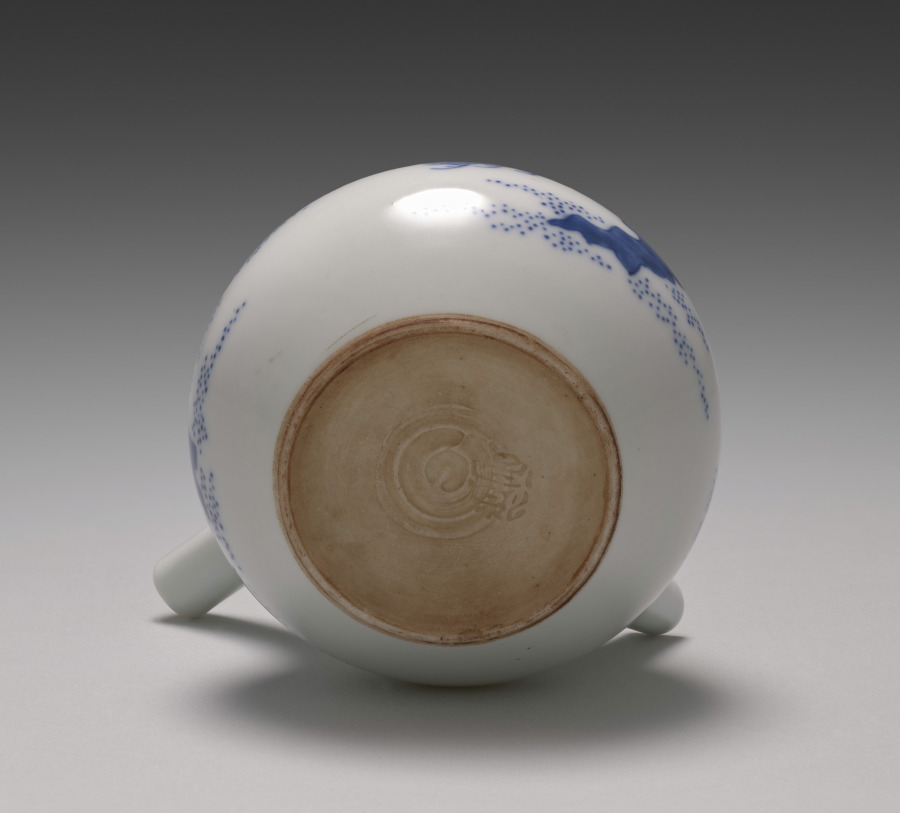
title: Teapot with Pines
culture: Japan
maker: Seifū Yohei III (Japanese, 1851–1914)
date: 1893–1914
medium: Porcelain with underglaze blue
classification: Ceramic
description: Side-handled teapots known as kyūsu and hot water coolers, or yuzamashi, are essential components of sencha tea sets. The teapot is, of course, meant for steeping and serving the tea. Yuzamashi are used to cool boiled water to the ideal temperature for the type of tea to be brewed. This teapot has a pine in underglaze blue on each side. The tip of one of these pines reaches onto the tiny lid, and as with the trees on the Water Cooler with Pines, CMA 2022.163, the trunks are curvy ribbons with little definition. Considering the execution of their designs, one might imagine the pot and cooler to have been part of the same set.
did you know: The teapot's box has a seal of Yamamoto Shōseidō, a shop in Osaka that sold fine ceramics.